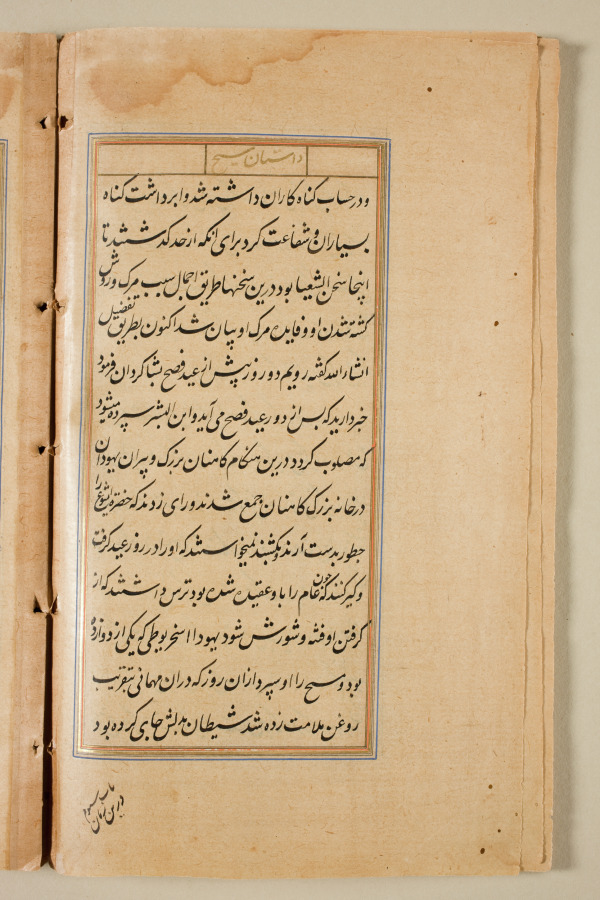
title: Text page from a Mirror of Holiness (Mir’at al-quds) of Father Jerome Xavier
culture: Mughal India, Allahabad, made for Prince Salim (1569–1627)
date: 1602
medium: Ink and gold on paper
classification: Manuscript